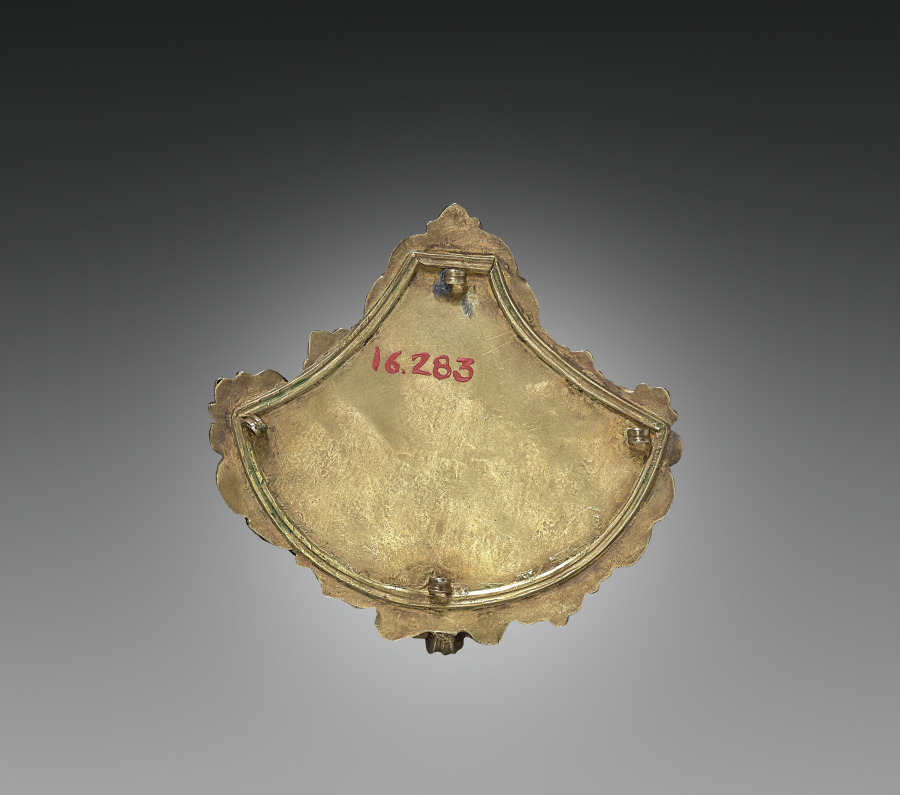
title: Pendant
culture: India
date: 1800s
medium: silver gilt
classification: Jewelry